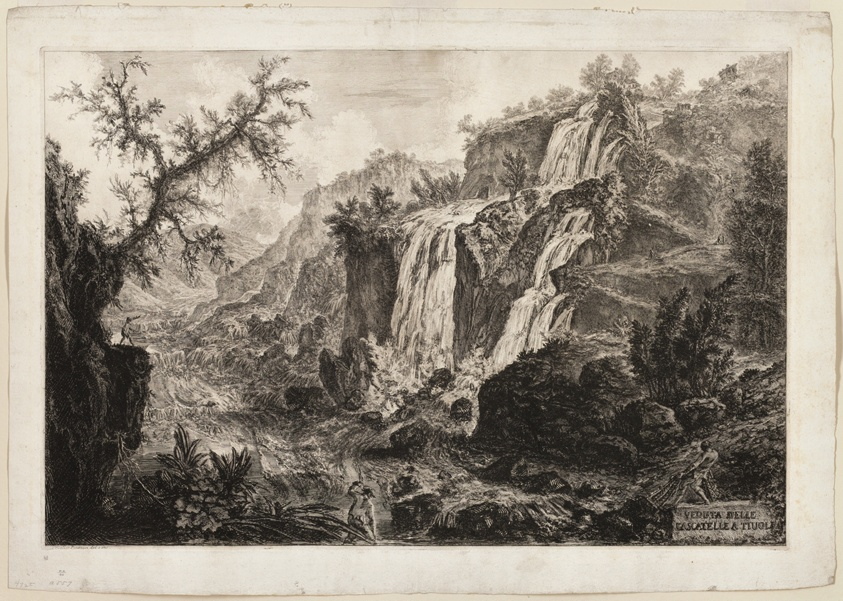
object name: Print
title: View of the Small Waterfall and Rapids, Tivoli, from Views of Rome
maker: Giovanni Battista Piranesi (Italian, 1720-1778)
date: 1769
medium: Etching on heavy ivory laid paper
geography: Italy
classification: etching; print; prints and drawing